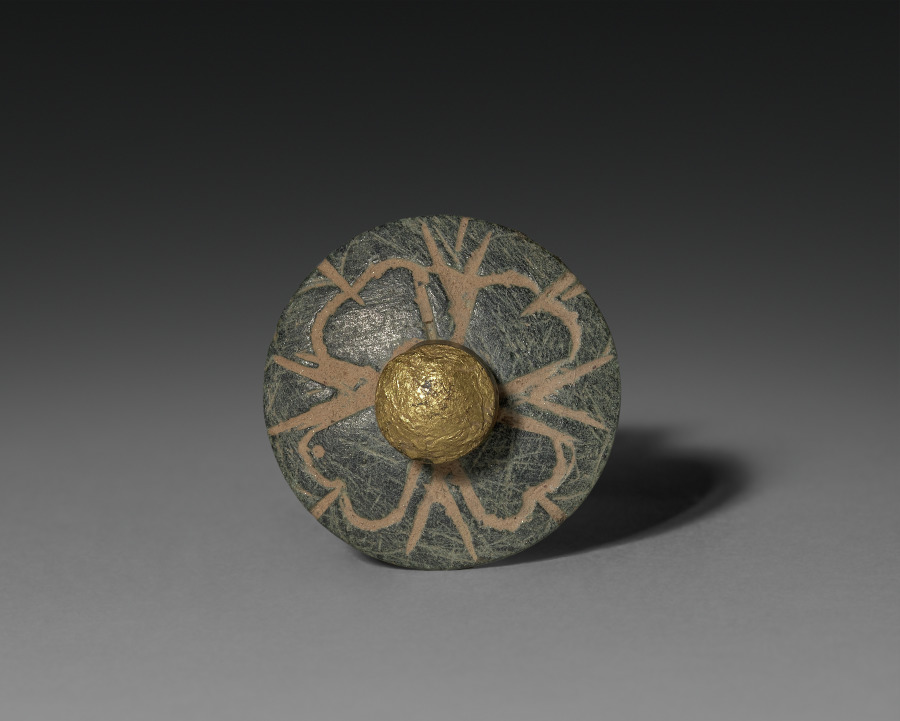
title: Miniature Stone Reliquary or Toilette Casket (lid)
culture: Pakistan, Gandhara, probably Sirkap, early Kushan period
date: 1–100 CE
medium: gray schist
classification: Sculpture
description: Tiny reliquaries holding the cremated remains of the Buddha or a high-ranking holy person empowered monuments and made them sacred. A Buddhist monument, such as the solid hemispherical mounds called stupas, would not be worshipped until it was consecrated with the relic secreted inside. Bits of ash were combined with tiny gems inside a crystal or glass reliquary, which was then placed inside a stone or metal container, like the lidded versions seen here. These containers look like cosmetic vessels for aromatic pastes used for perfume in ancient India. Buddhist texts state that the enlightened Buddha emitted a fragrance like sandalwood paste; the form of the reliquary as a perfume bottle indicates the presence of the Buddha by the visual reference to his pleasant scent. Once enclosed in the stupa the reliquaries would not be seen, but monks were tasked with applying sandalwood paste to the exterior of stupas as part of their regular maintenance to convey to visitors the ongoing presence of the Buddha radiating from the relic in the center.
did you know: The knob of the lid is gilded, as is the interior of the casket.